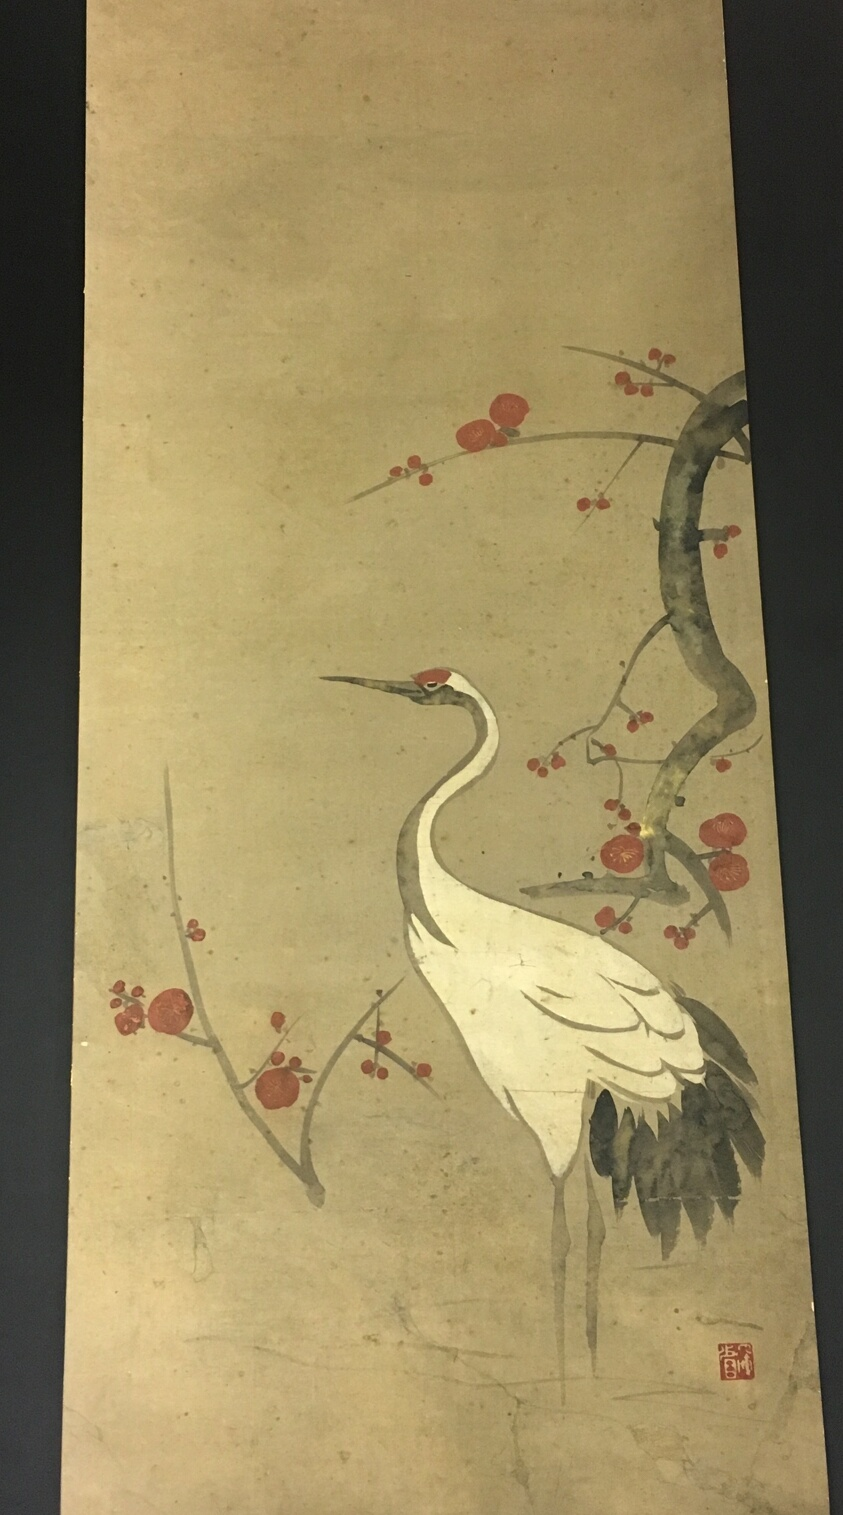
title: Red Plum Branch and a Crane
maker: After Ogata Kenzan (Japanese, 1663-1743)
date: 19th century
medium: One of six panels of a screen; ink and colors on paper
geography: Japan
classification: screen; painting; asian art